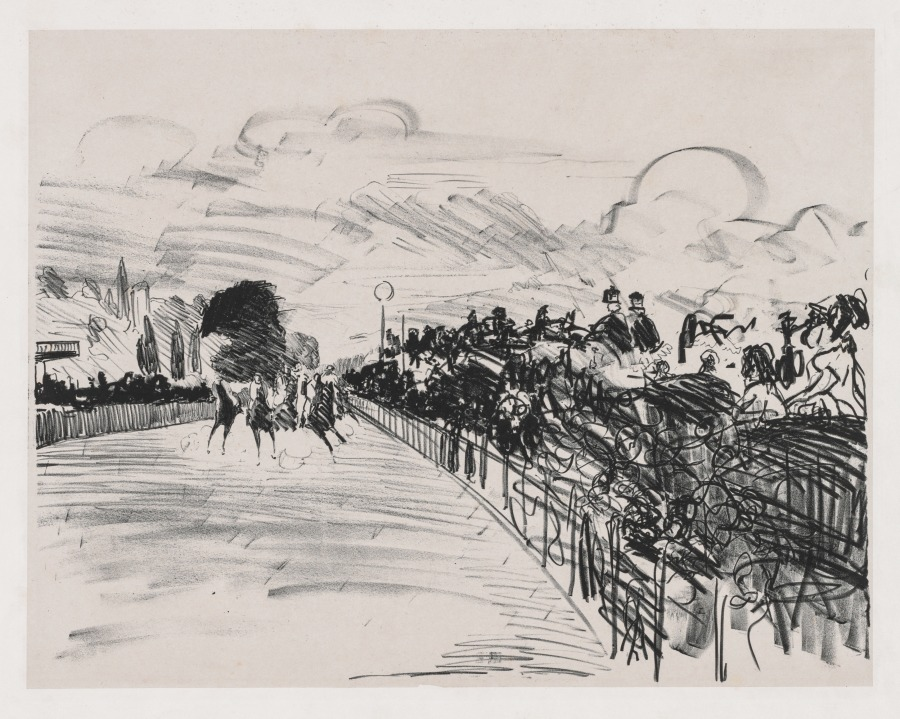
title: The Races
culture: France, 19th century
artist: Édouard Manet (French, 1832–1883)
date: 1865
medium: lithograph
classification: Print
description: The Races is based on Manet's painting The Races at Longchamp. The lithograph, however, conveys the excitement of horse racing even more than the painting. Energy and movement are suggested by bold, quickly drawn lines and by rapid, curving smudges. The unrestrained, spontaneous use of the lithographic crayon foreshadows the expressiveness of 20th-century printmaking.